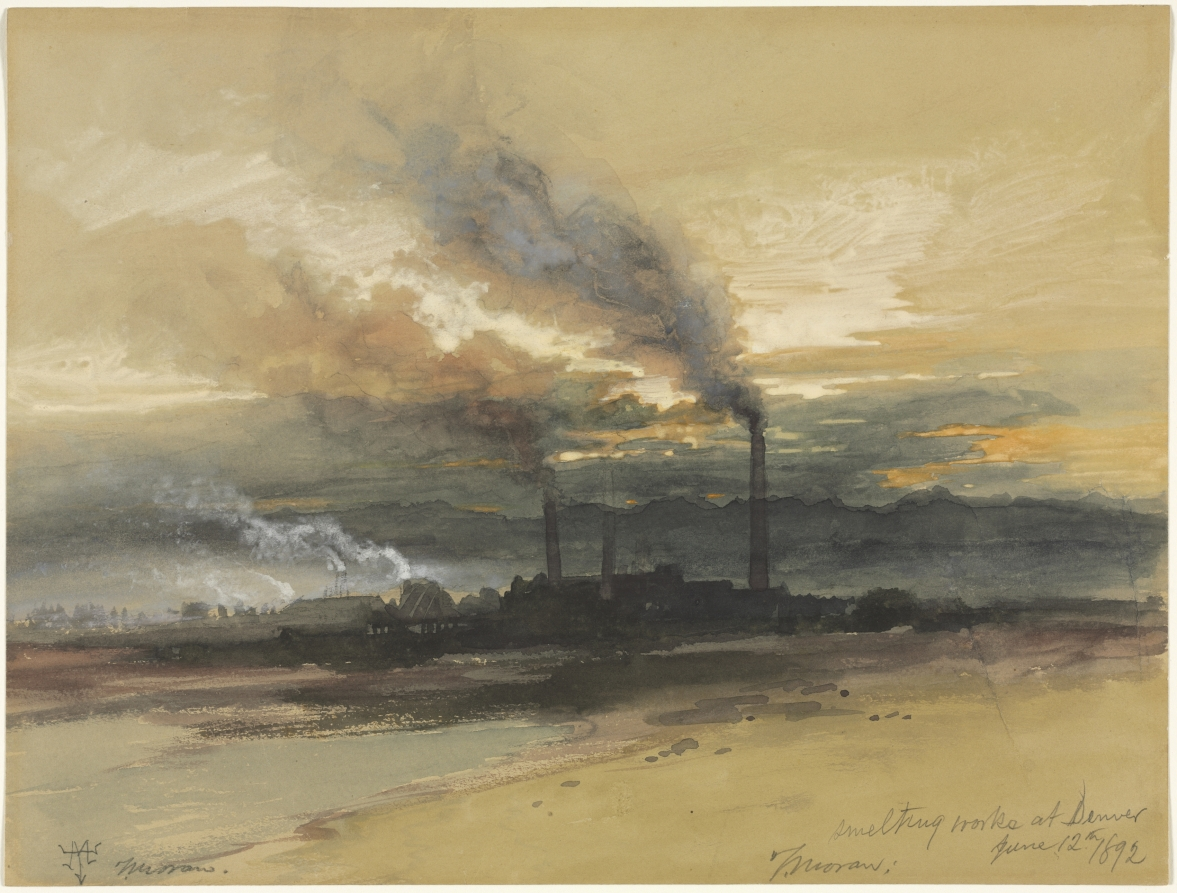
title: Smelting Works at Denver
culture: America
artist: Thomas Moran (American, born England, 1837–1926)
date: 1892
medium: watercolor and gouache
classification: Drawing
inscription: signed, lower left, in graphite: [artist's monogram: TM] Moran; signed, lower right, in graphite: smelting works at Denver / T. Moran: June 12th 1892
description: For today's viewers of Thomas Moran’s watercolor, the sight of factory smoke pouring into pristine mountain air might prophesy environmental ruin. Yet within the context of America’s western expansion, the imagery of factories was more ambiguous. Some in Moran's time regarded the factories as a force of destruction, while others interpreted them as symbols of progress. Moran himself viewed Denver’s budding industry with enthusiasm, writing positively to his wife about the city’s growth since he first visited while part of a government survey in 1873. Two decades later, when Moran returned to Denver to paint advertisements for the Santa Fe Railroad, smelting—the extraction of metal from heated rock—had transformed the city into an industrial hub. Although the brooding tone of this watercolor is unlike the artist’s bright, misty-eyed paintings of Edenic splendor, his depiction of the west’s emerging industrial landscape reinforces the same myth of manifest destiny—the belief that settler conquest of Native American lands was inevitable and justified—by illustrating the land’s richness in natural resources. Like the English Romantic painter J. M. W. Turner, whose style he emulated, Moran was primarily interested in the pictorial possibilities of industry. In this impressionistic study, Moran manipulates gray wash and white gouache to capture the vaporous quality of smoke and clouds as the two substances, industrial and natural, dissipate into the yellow atmosphere.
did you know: Moran sketched this image while waiting for his travel arrangements to be resolved, having learned that he received a commission for a large painting of Wyoming for the World’s Columbian Exposition in Chicago in 1893.